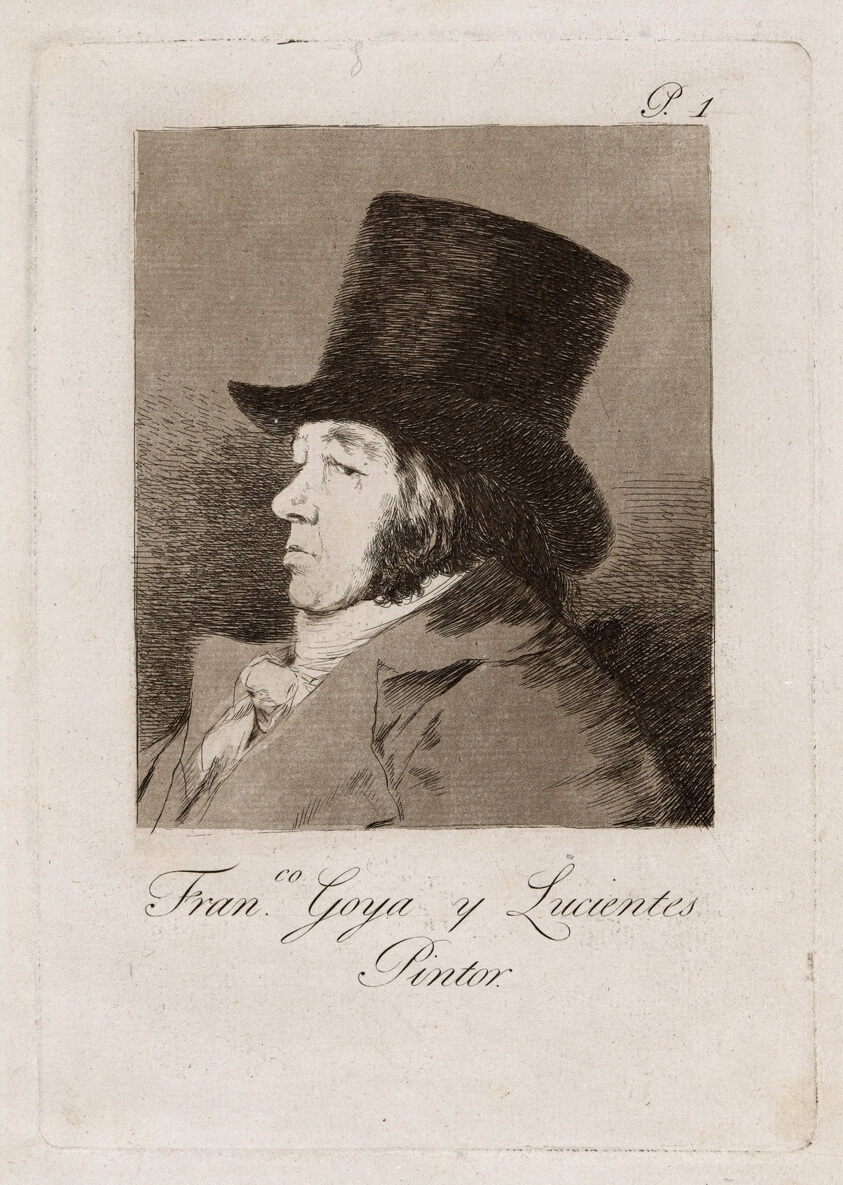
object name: Print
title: Francisco Goya y Lucientes, Painter, plate one from Los Caprichos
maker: Francisco José de Goya y Lucientes (Spanish, 1746-1828)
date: 1797/99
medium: Etching, aquatint, drypoint and burin in black on ivory laid paper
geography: Spain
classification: etching; print; prints and drawing; burin; drypoint; aquatint